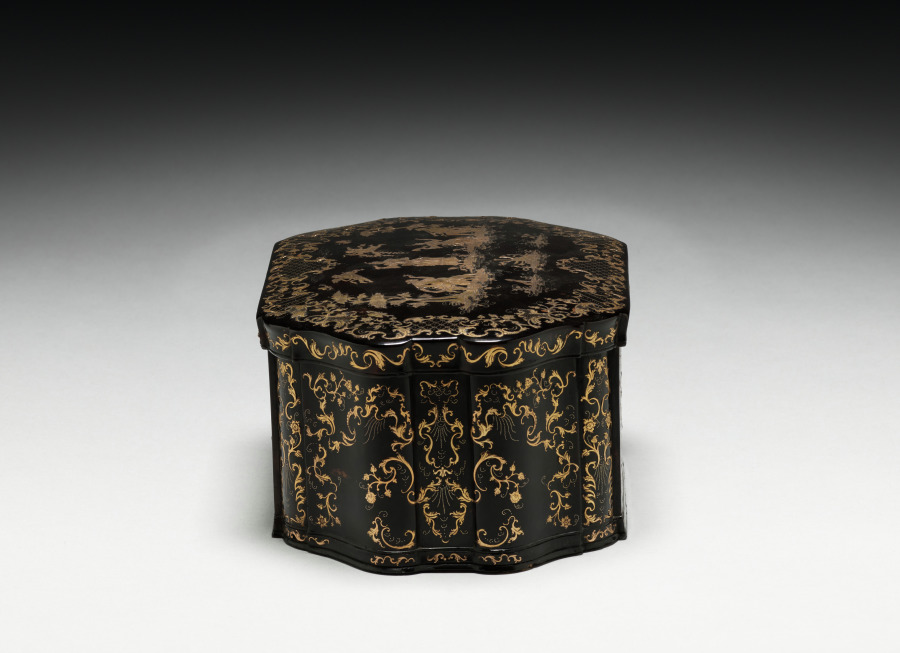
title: Box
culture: Italy, Naples (?), 18th century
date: c. 1750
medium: tortoise shell and gold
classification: Miscellaneous